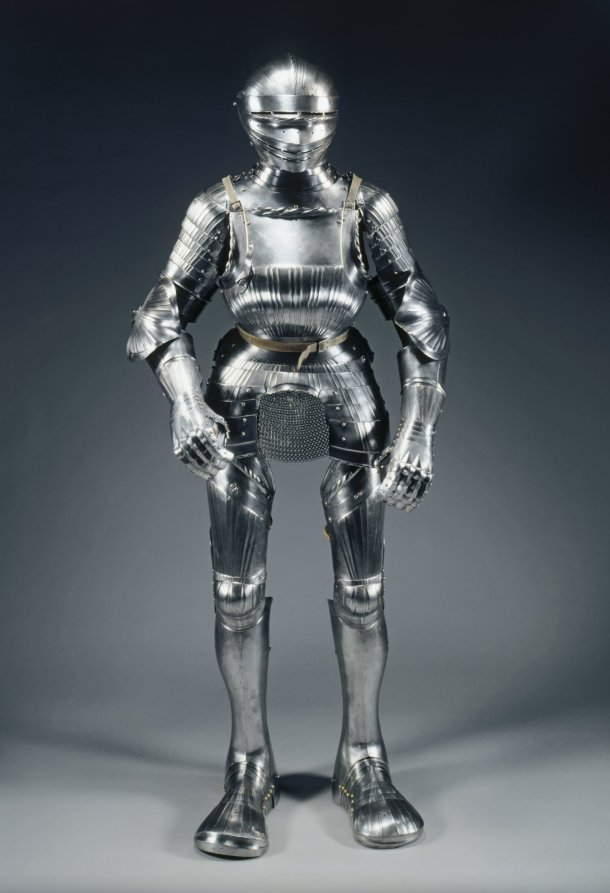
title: Field Armor in Maximilian Style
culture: Germany, Augsburg(?), early 16th century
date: c. 1510–15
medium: fluted steel with leather straps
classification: Arms and Armor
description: Most of the elements of this armor were made together, forming a single suit. The lower legs contain some modern restorations. The helmet is believed to be the work of the esteemed Augsburg armorer, Lorenz Helmschmied, who was active at the Habsburg, Mantua, and Urbino courts between 1467 and his death in 1515.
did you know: This armor was made to mimic the trend of pleated clothing that was popular at the time.